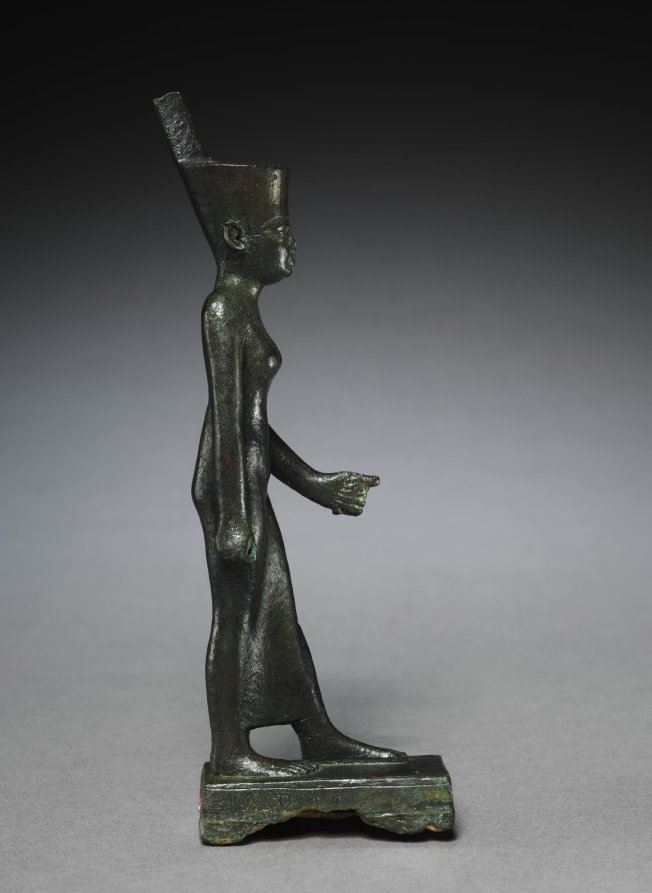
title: Statuette of Neith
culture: Egypt, Greco-Roman period (332 BCE–395 CE), Ptolemaic dynasty (305–30 BCE)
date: 305–30 BCE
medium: bronze, solid cast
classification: Sculpture